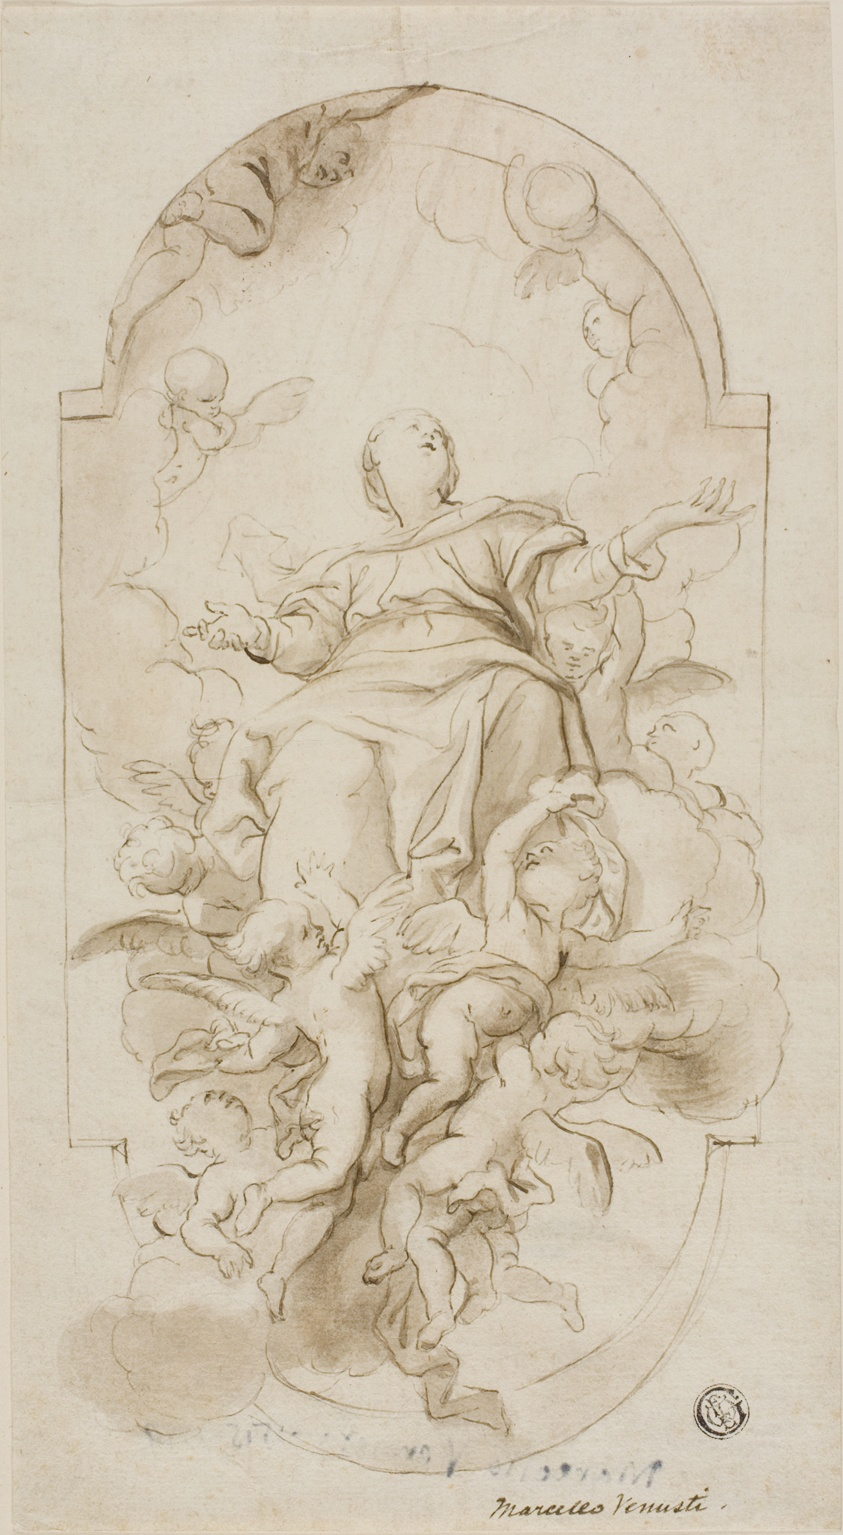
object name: Drawing and Watercolor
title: Assumption of the Virgin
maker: Domenico Piola (Italian, 1627-1703); or Marcello Venusti (Italian, 1512/15-1579)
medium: Pen and brown ink, brush and brown wash, over black chalk, on ivory laid paper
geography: Italy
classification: pen and ink drawings; drawings (visual works); prints and drawing